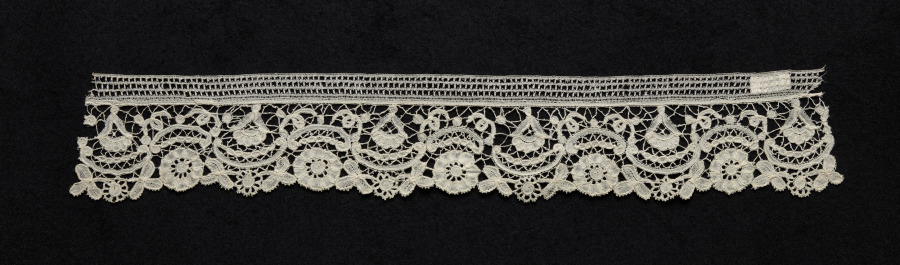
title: Lace Edging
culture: Belgium, Brussels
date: 1800s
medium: Linen: bobbin lace (Duchesse)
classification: Lace